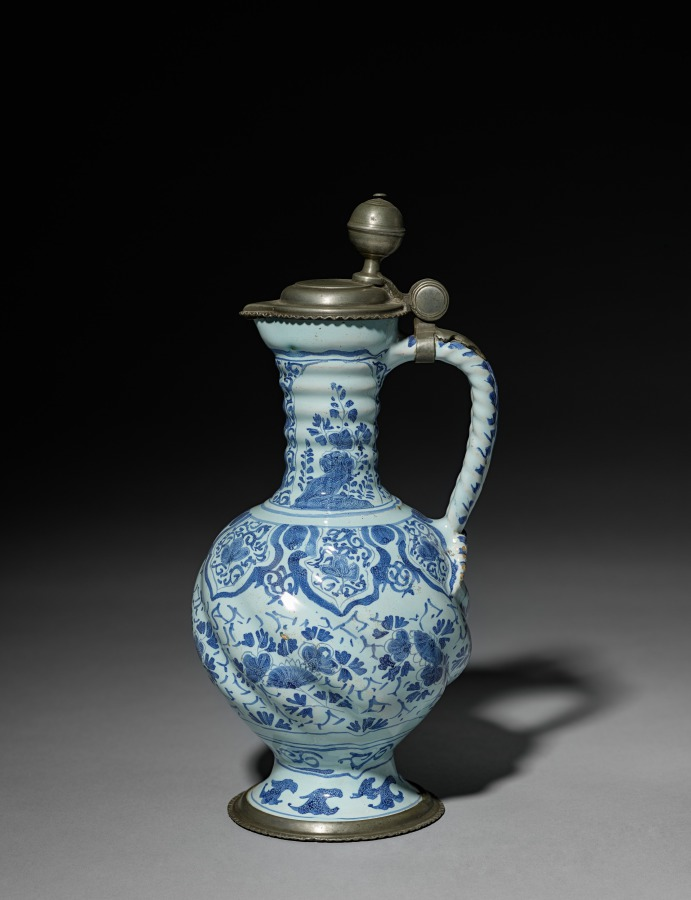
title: Ewer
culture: Germany, Frankfurt(?), early 18th century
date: c. 1700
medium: earthenware decorated in underglaze blue with pewter mounts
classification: Ceramic